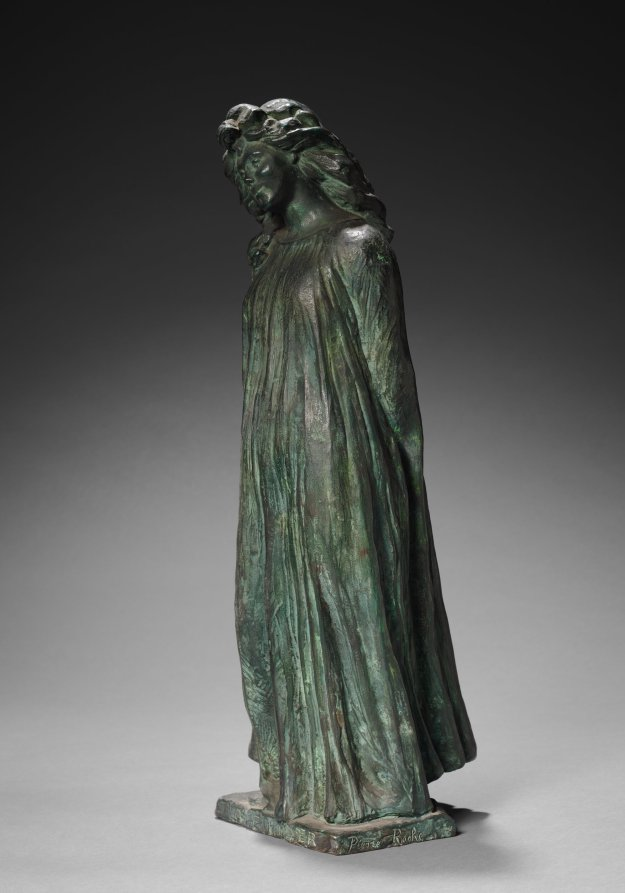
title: Loïe Fuller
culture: France, 19th-20th century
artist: Pierre Roche (French, 1855–1922)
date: c. 1900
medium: bronze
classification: Sculpture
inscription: Inscribed on the face of the base: "Loïe Fuller" and at the right, signature of the artist